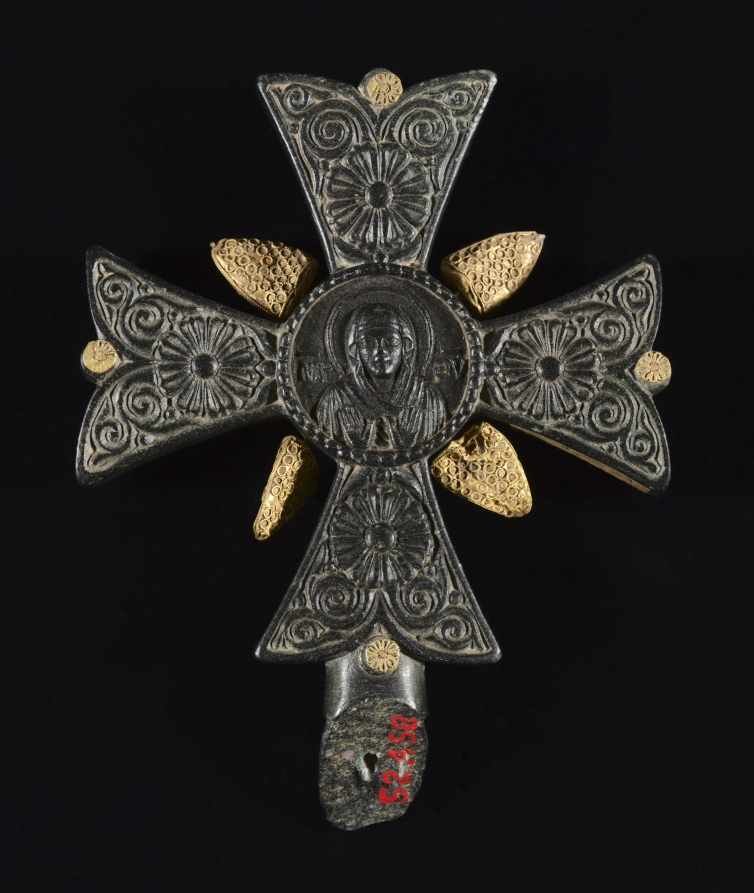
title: Benediction Cross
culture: Byzantium, Byzantine period, 13th-15th century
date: 1200s-1400s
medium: black schist, gold, silver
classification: Glyptic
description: This cross is decorated with images of Christ Pantokrator (Ruler of the World) on the front and the Virgin Orans (Virgin Praying) on the back.